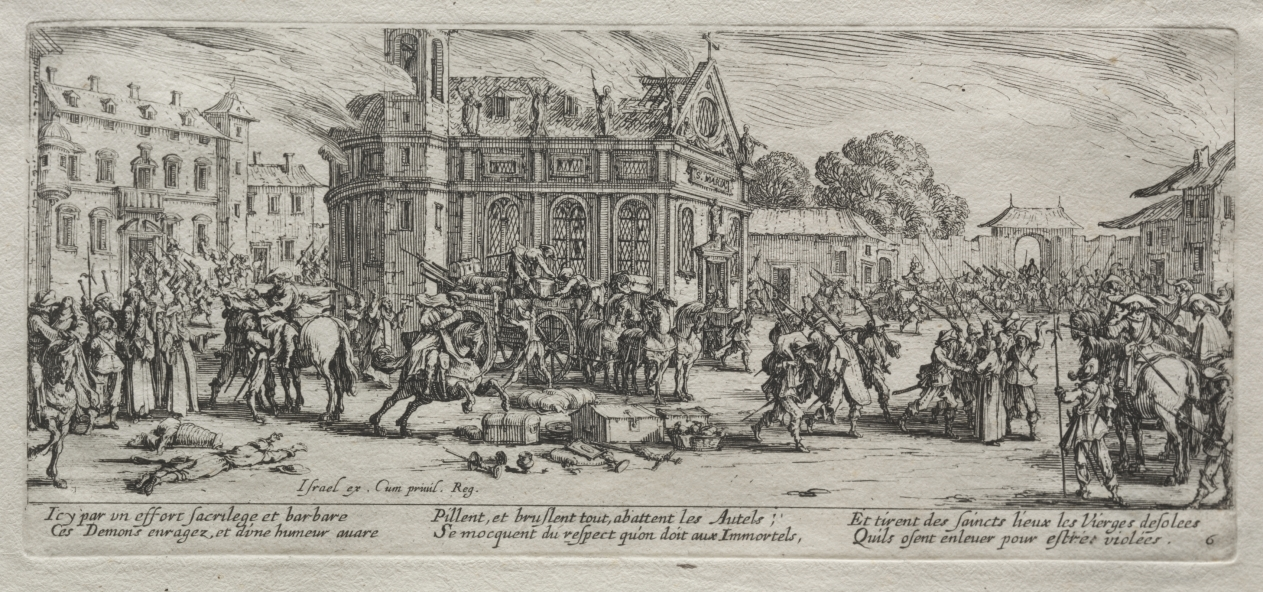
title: The Large Miseries of War: Devastation of a Monastery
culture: France, 17th century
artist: Jacques Callot (French, 1592–1635)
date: 1633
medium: etching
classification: Print